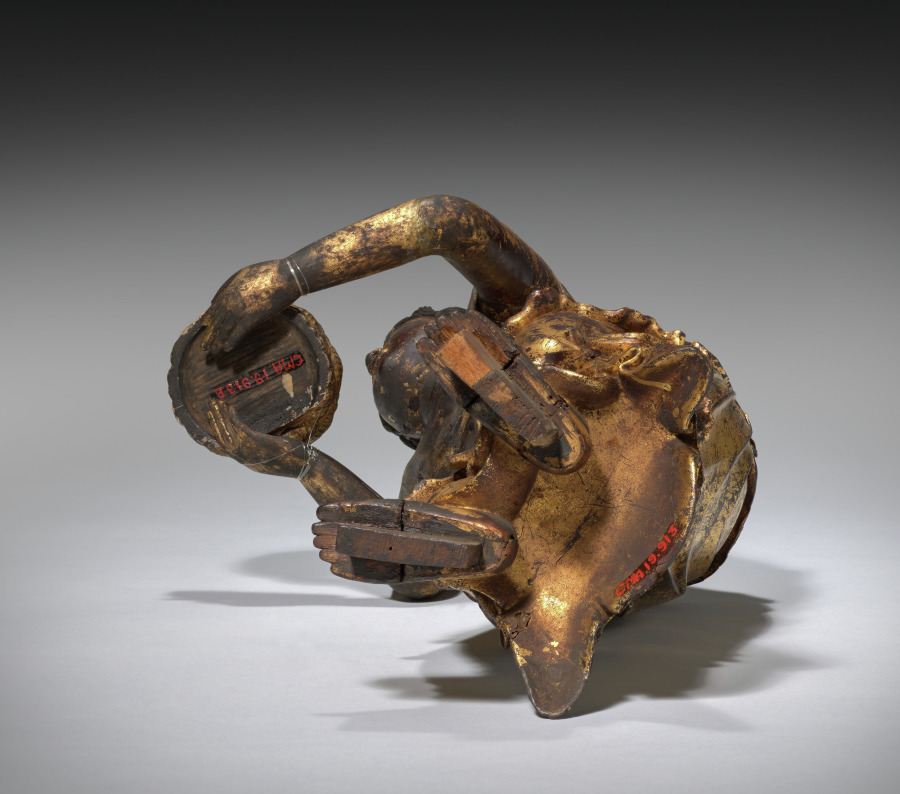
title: Kannon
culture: Japan, Kamakura period (1185–1333)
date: early 1200s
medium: wood with lacquer and gold leaf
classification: Sculpture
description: Kannon, the bodhisattva of compassion, is one of the two bodhisattvas attending Amida, the Buddha of the Western Paradise. The sculpture stands on a lotus pedestal, holding a lotus dais on which the soul of the faithful is received into paradise. The use of gold was prevalent in Buddhist art during this time—it was believed that the yellow light permeated the regions of the Amida—and Amida worship prevailed throughout Japan.